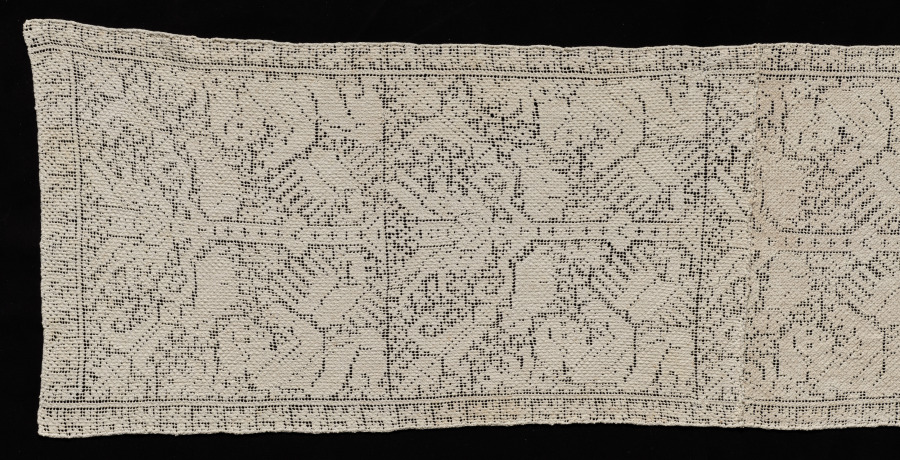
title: Panel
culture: Spain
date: 1800s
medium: Linen: needle lace, filet/lacis (knotted ground and darned in two directions)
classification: Lace